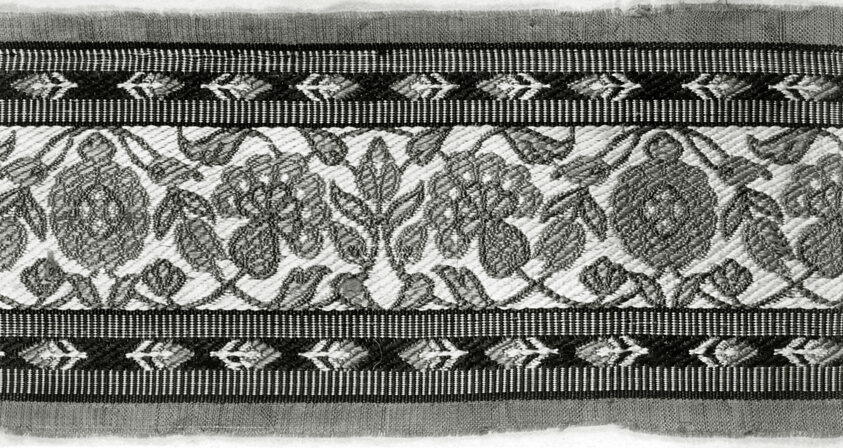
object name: Textile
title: Fragment (Border)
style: yazd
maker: Iran (Persia, Yazd)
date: 17th century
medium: Brocaded, twill weave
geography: Iran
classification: textile; weaving